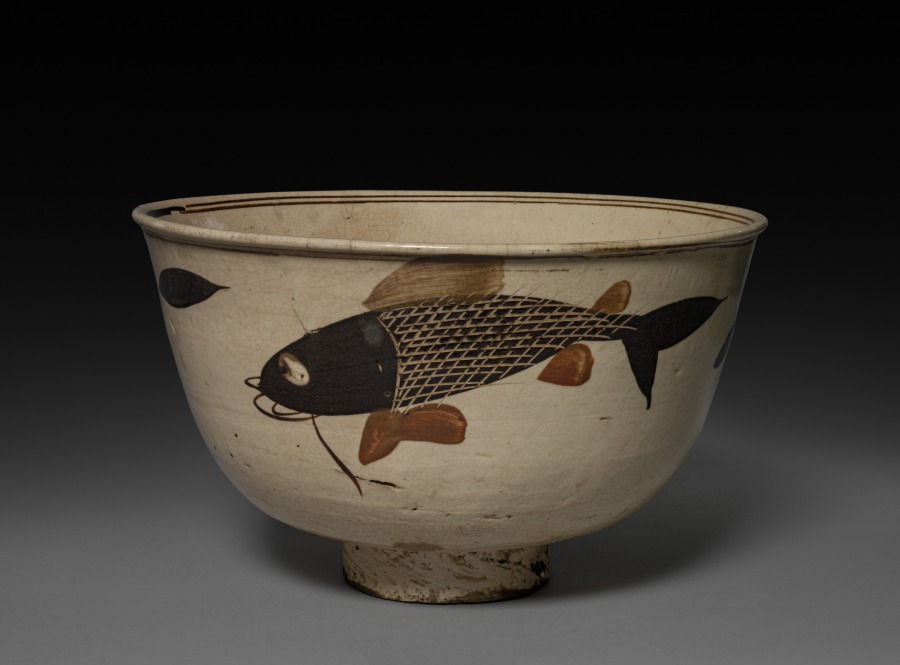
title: Bowl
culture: China, Ming dynasty (1368–1644)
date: 1368–1644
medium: stoneware, Cizhou ware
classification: Ceramic